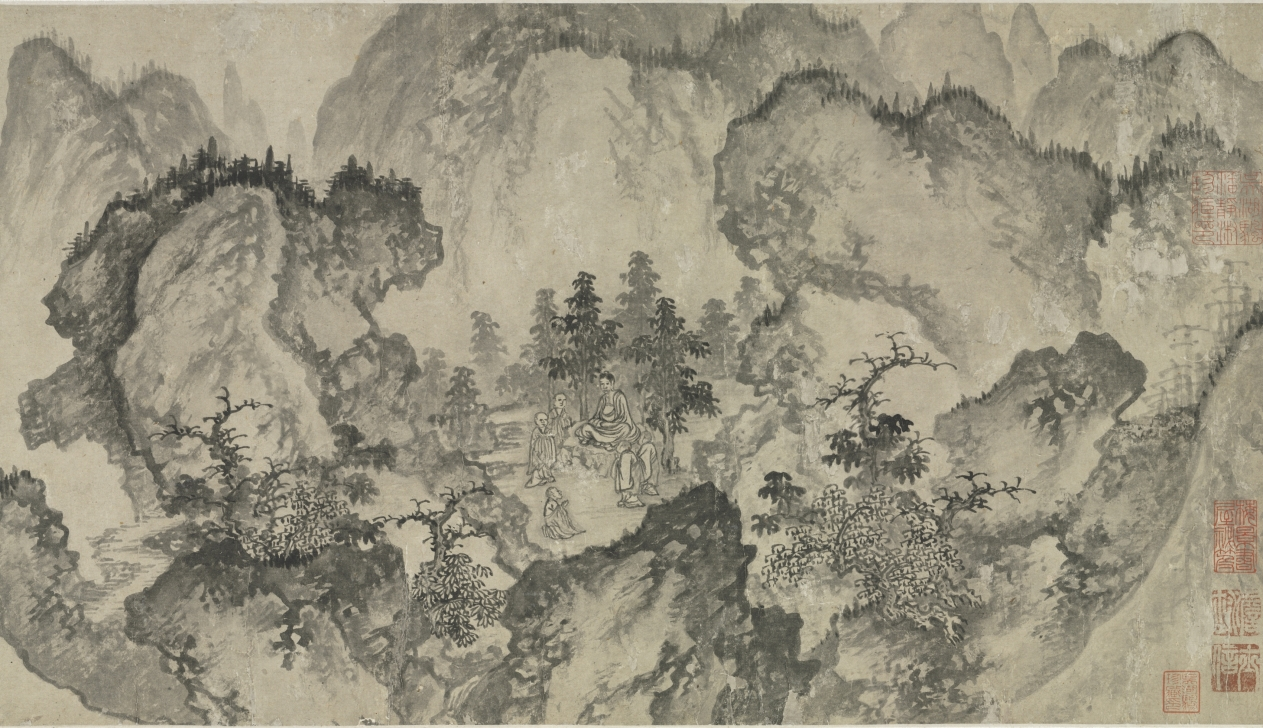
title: Buddha's Conversion of Five Bhiksu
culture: China, Yuan dynasty (1271–1368)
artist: Li Sheng (Chinese, active c. 1324–after 1375)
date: mid-1300s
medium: handscroll; ink on paper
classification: Painting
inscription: 紫篔生李升識 [印] 李氏子雲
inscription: 4 colophons and 12 additional seals: The "Heart" Sutra (Maha Prajnaparamita) text written by Wu Yuqing 吳餘慶 (active early 1400s); 2 seals of Xu Qianxue 徐乾學 (1631–1694); 3 colophons, one dated 1929 and two dated 1936, and 9 seals of Wu Hufan 吳湖帆 (1894–1968); 1 colophon, dated 1932, of Chen Dingshan; 1 seal unidentified.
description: This episode stems from the life of the historical Buddha, who, after his enlightenment, was initially hesitant about preaching his own doctrine. After much personal deliberation and prodding by deities, he finally relented. The first converts were the five guards who served him when he was still a prince. For Li Sheng, this is the pretext of the painting, which moves from the interaction of the bhiksu with the Buddha to a broader awareness of the vast surroundings of the scene.